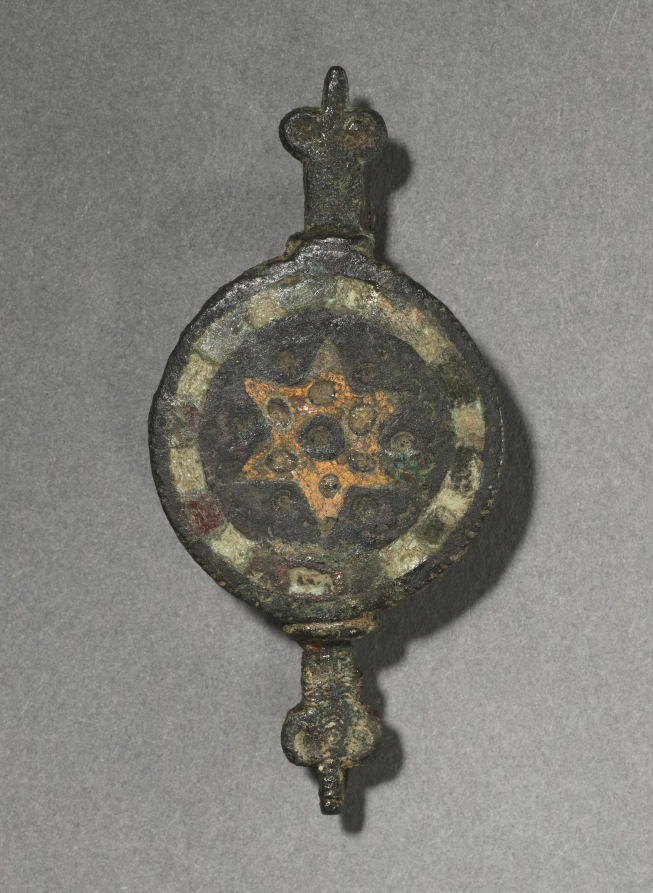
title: Ornamental Brooch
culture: Gallo-Roman or Romano-British, Migration period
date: c. 100–300 CE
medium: bronze and champlevé enamel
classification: Jewelry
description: These brooches functioned as garment clasps (much like the generally larger fibulae) and are distinctive for their decorative enamels. The art of enameling was highly popular among the conquered peoples who lived on the outskirts of the Roman empire, chiefly the Celts and the Gauls. Though the enameling technique was practiced by the Romans themselves on small objects, the brightly colored decoration readily appealed to "barbarian" taste. By the AD 200s, enameled brooches like these were being made in abundance by the native peoples of Britain and Gaul (modern France and Belgium).